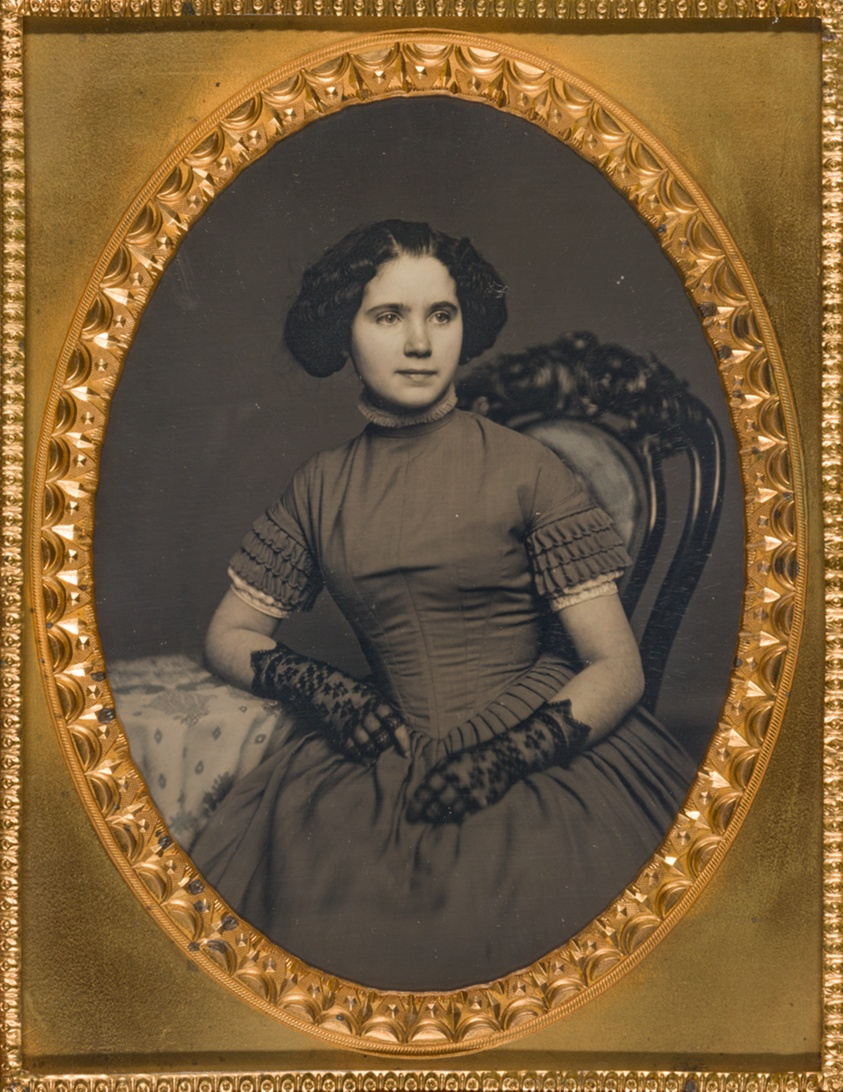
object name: Photograph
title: Untitled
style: 19th century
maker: Artist unknown; 19th century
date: 1839/60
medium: Daguerreotype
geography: Unknown Place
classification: daguerreotype; photographic process; photography; photograph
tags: portraits, portraits: female subject, photography, formal portraits